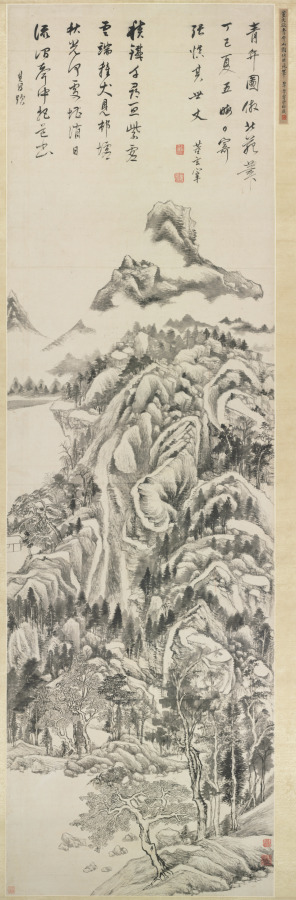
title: Mt. Qingbian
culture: China, Ming dynasty (1368–1644)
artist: Dong Qichang (Chinese, 1555–1636)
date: 1617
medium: hanging scroll, ink on paper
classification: Painting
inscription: Artist's first inscription, signature, and 2 seals: A painting of the Qingbian Mountains in the manner of Beiyuan [Dong Yuan]. In the summer of the dingsi year [1617], on the last day of the fifth month, [I] send this to my senior, Zhang Shenqi. Dong Xuanzai [seals] Zhi zhi hao ri jiang guan 知制誥日講官; Dong Qichang yin 董其昌印.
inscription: Artist's second inscription and signature: Piling irons for ten thousand feet guard the purple sky;/ Where puppies are seen on top of clouds, villages and marketplaces lie./ In the splendor of autumn, where is the most worthy spot to spend the day?/ Amid the rustling sounds of mountain streams, with a volume in hand, meditating on the Way [Dao]. Inscribed by Qichang. (trans. WKH/LYSL)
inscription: 4 additional seals: 3 of Li Enqing 李恩慶 (jinshi of 1833); 1 of Weng Wan-go 翁萬戈 (b. 1918).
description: Dong Qichang radically transforms the landscape composition into a purely abstract design. He organizes the mountain forms to achieve an overall sense of structure, activating the flow of energy (qi) and the momentum of force (shi) throughout the pictorial design. In his art, brush and ink assume life independent of the depicted forms, so that the painting can be appreciated for “the sheer marvels of brush and ink.”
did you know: Dong Qichang had visited the Bian Mountains, which are part of a low range located not far from Wuxing and Lake Tai in the southern province of Zhejiang.